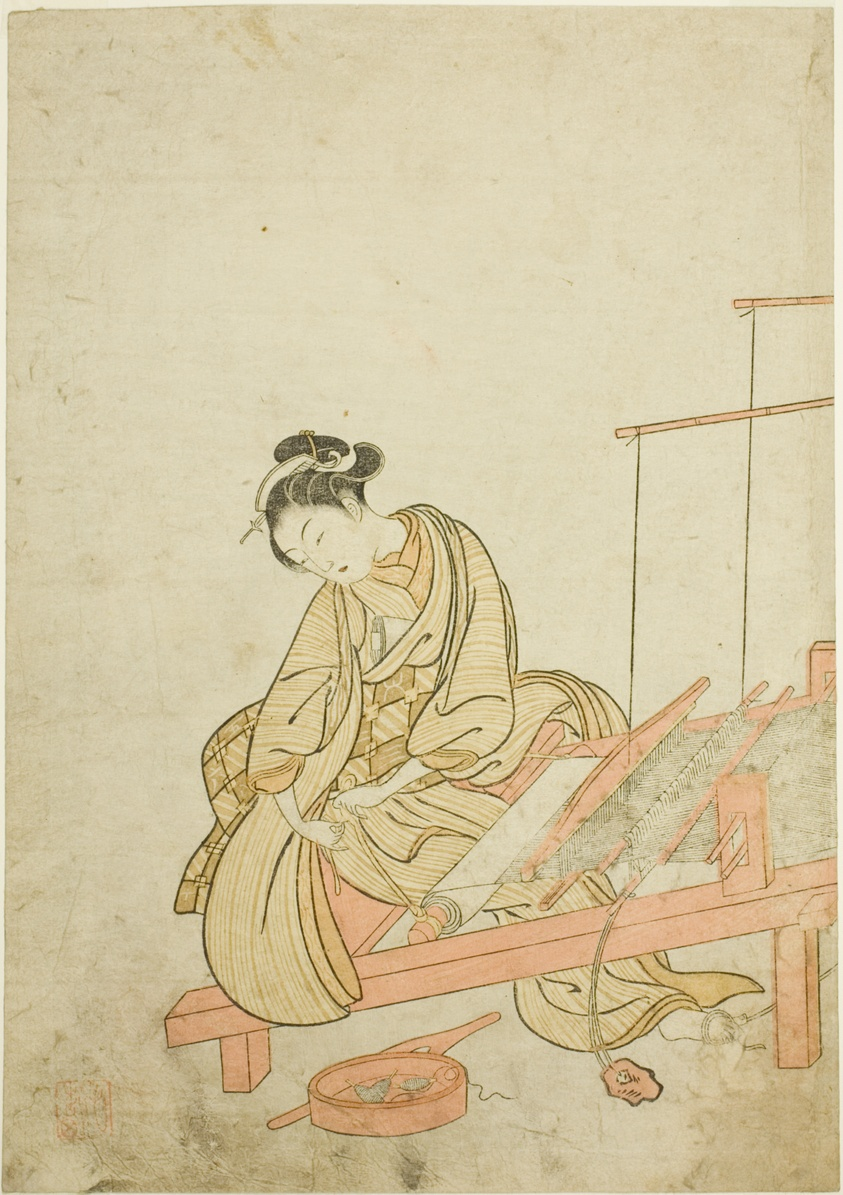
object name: Print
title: Young Woman at a Loom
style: Japanese (culture or style)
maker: Suzuki Harunobu 鈴木 春信; Japanese, 1725 (?)-1770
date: 1765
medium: Color woodblock print; chuban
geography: Japan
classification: woodblock print; print; asian art